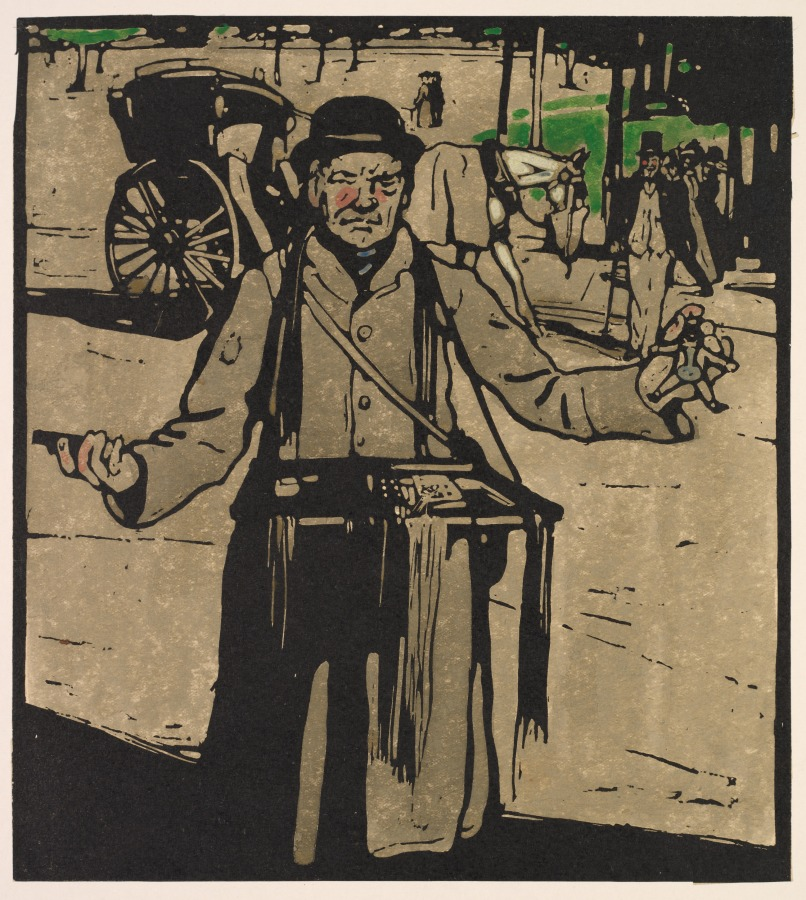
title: London Types: Hawker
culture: England, 19th century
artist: William Nicholson (British, 1872–1949)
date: 1898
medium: woodcut hand-colored with watercolor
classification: Print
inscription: lower left margin, in black ink: William Nicholson - 1898 -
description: At the turn of the last century, civic pride inspired stories, songs, poems, and images of London and its people—both noble and humble. William Nicholson personified Londoners, such as hawkers selling trinkets, with his London Types. The series proved so popular that William Ernst Henley composed poems to accompany each print. Tourists could imagine encountering each of Nicholson's characters, from the barmaid to the beefeater, and locals could say, "I know him."